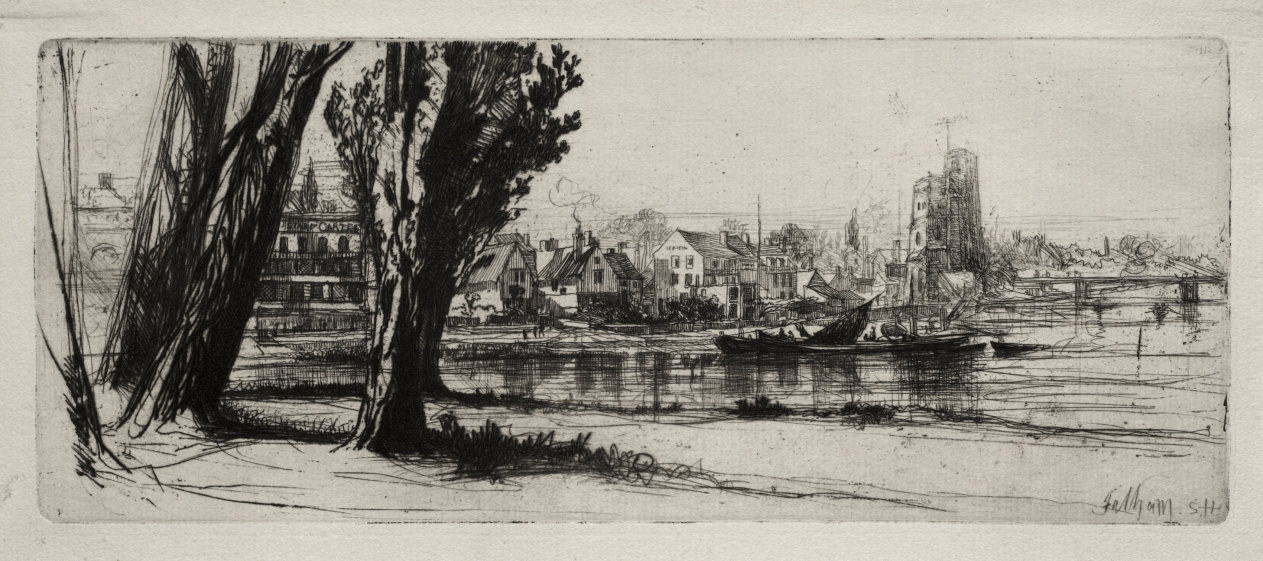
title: Fulham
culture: England, 19th century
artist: Francis Seymour Haden (British, 1818–1910)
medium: etching and drypoint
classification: Print